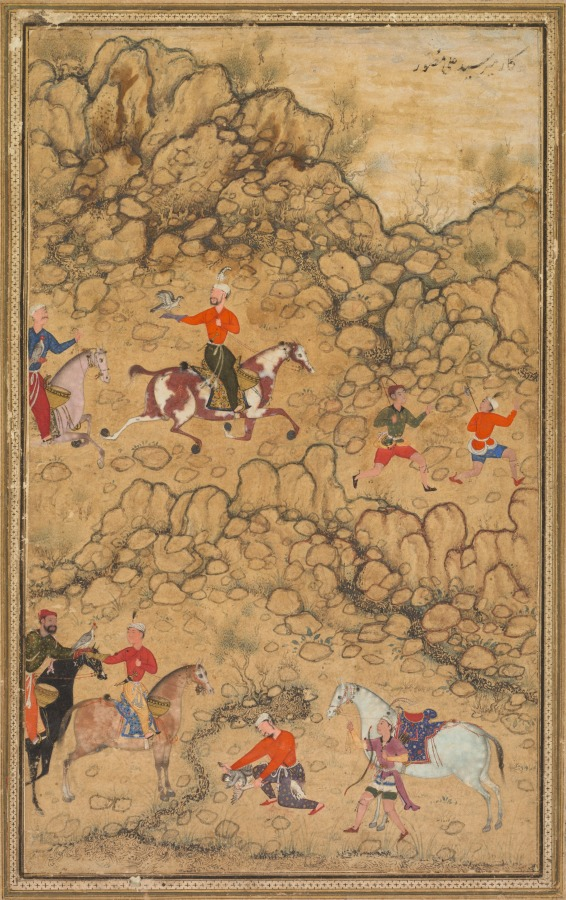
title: Hunting with falcons in a landscape (recto)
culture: Mughal India, court of Akbar (reigned 1556–1605)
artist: attributed to Abd al-Samad (Persian, c. 1510–1600)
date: c. 1558–60; borders added probably 1700s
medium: Gum tempera, ink, and gold on paper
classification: Painting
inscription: Inscription in upper right in nasta‘liq script, probably during the 1700s: the work of Mir Sayyid Ali, the illustrator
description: Mughal princes hunted on horseback with falcons. The hunting party would ride out into the wild and flush the prey from the brush. Then, its hood removed, the falcon would chase the prey and bring it down. This important work is thought to have been painted by one of the Persian artists Akbar’s father brought to India from Iran shortly after his arrival in India. The delicacy of the diminutive figures and the gently modeled rocks of the arid landscape contrast to the boldly dynamic paintings made by Indian artists.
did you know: The hunter’s glove is on the ground, as he pulls his falcon off the duck.